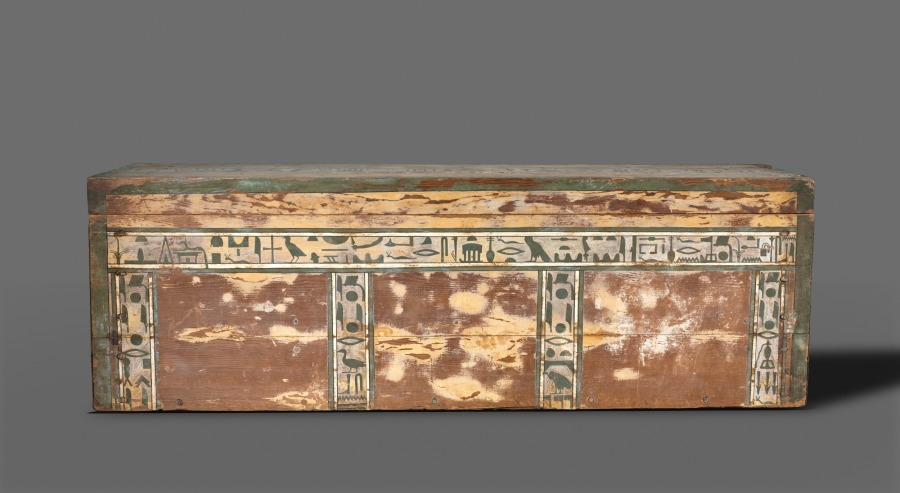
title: Coffin of Senbi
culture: Egypt, Meir, Middle Kingdom, mid-Dynasty 12, reign of Amenemhat II to Sesostris III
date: c. 1918–1859 BCE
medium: gessoed and painted cedar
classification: Funerary Equipment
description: The most common type of coffin during the Middle Kingdom took the shape of a rectangular box with lid. The mummy inside was placed on his left side, facing east, his head behind the two magical eyes. These—in the shape of human eyes, to which have been added the markings of a falcon's head—were supposed to enable him to behold the rising sun, reborn daily. The long horizontal inscriptions are prayers to Anubis (god of embalming) and Osiris (god of the dead) for offerings of food and drink and other items necessary for survival in the afterlife. The short vertical inscriptions place him under the protection of the gods of earth, sky, air, and moisture, as well as various funerary deities.